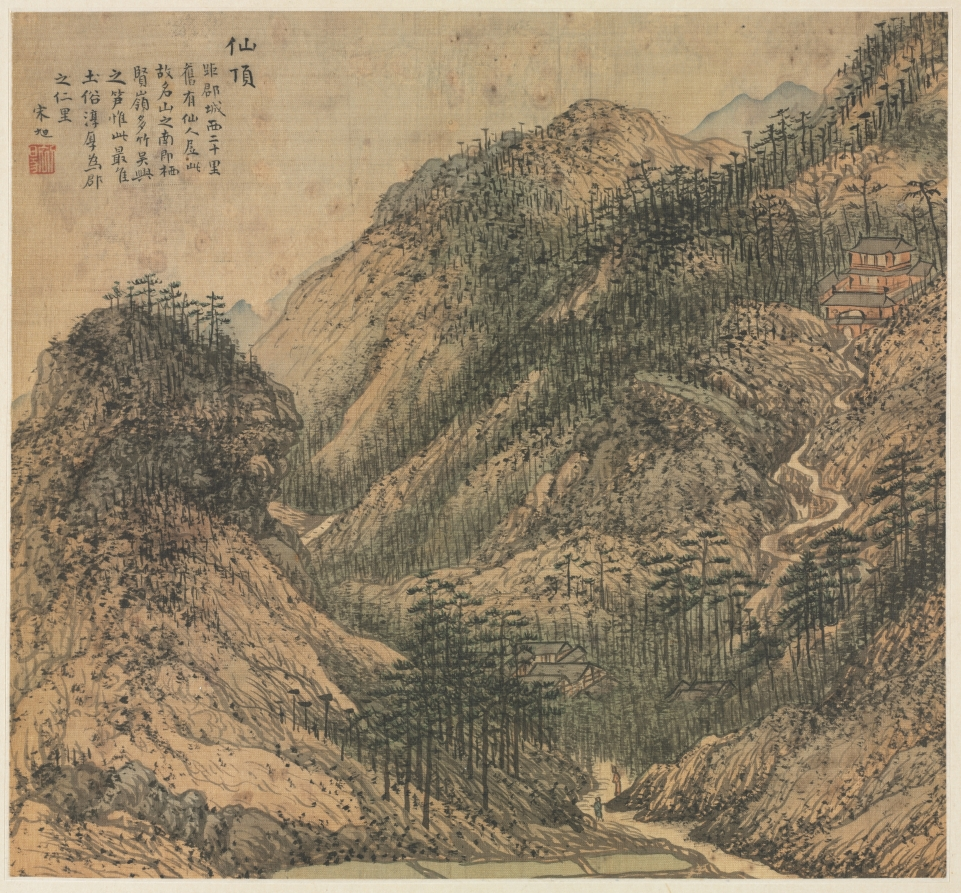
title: Xianding (Immortal's Peak)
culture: China, Jiaxing, Ming dynasty (1368–1644)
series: Eighteen Views of Huzhou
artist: Song Xu (Chinese, 1525-c. 1606)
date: c. 1588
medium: Album leaf; ink and color on silk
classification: Painting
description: By the 1500s, visits to historic and scenic sites in the lower Yangzi delta stimulated an increase of printed illustrated travel books. Topographical depictions of local scenery flourished. Leaves from this album illustrates sites around Lake Tai of the two adjacent counties Changxing and Wuxing (modern Huzhou). Song Xu, who lived intermittently in Jiaxing and Songjiang, must have passed through Wuxing by boat and thus knew the region. The paintings are inscribed with gazetteerlike notations, suggesting that the album was produced for clients as commemorative works, a travel guide, or for “armchair travel” (woyou) in one’s mind.